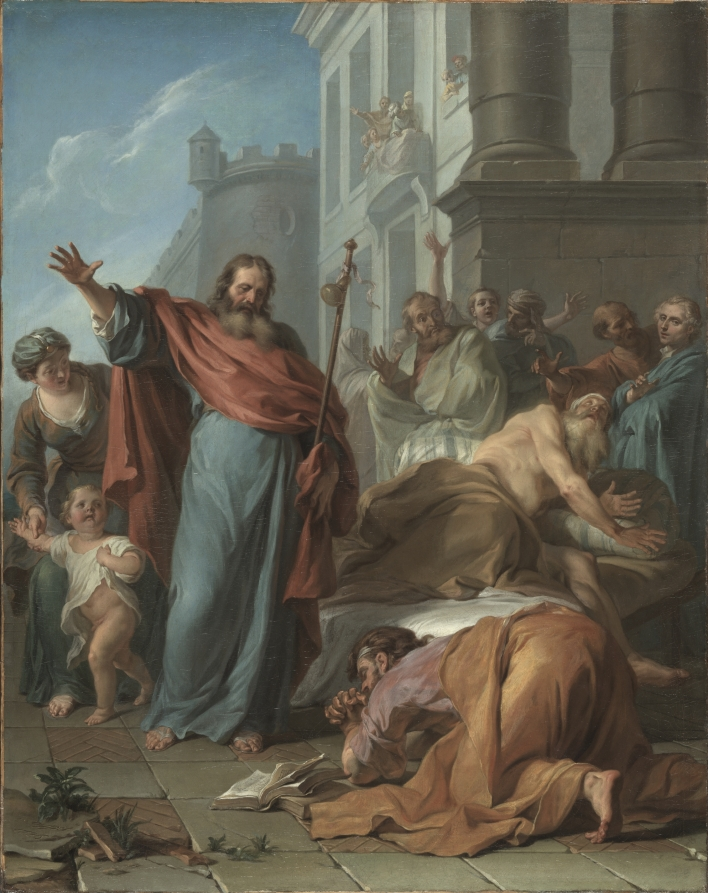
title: The Miracles of Saint James the Greater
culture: France, 18th century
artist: Noël Nicolas Coypel (French, 1690–1734)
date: 1726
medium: oil on canvas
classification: Painting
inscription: Signed lower left: "N. Coypel / 1726"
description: Noël Nicolas Coypel combined two stories associated with Saint James the Greater, one of the twelve apostles of Christ. In the foreground is the magician Hermogenes, begging forgiveness. Hermogenes had cast a spell on James, but the saint turned the curse back on him. When James offered to protect Hermogenes against the demons assaulting him, the magician cast aside his pagan texts in favor of Christianity. According to the second legend, James miraculously cured a paralytic man (in the middle ground at right), thereby averting his own execution and causing the prosecutor to convert. Although this painting is relatively small, the clear composition, grand architectural setting, and dignified and expressive poses of the figures endow it with monumental presence.